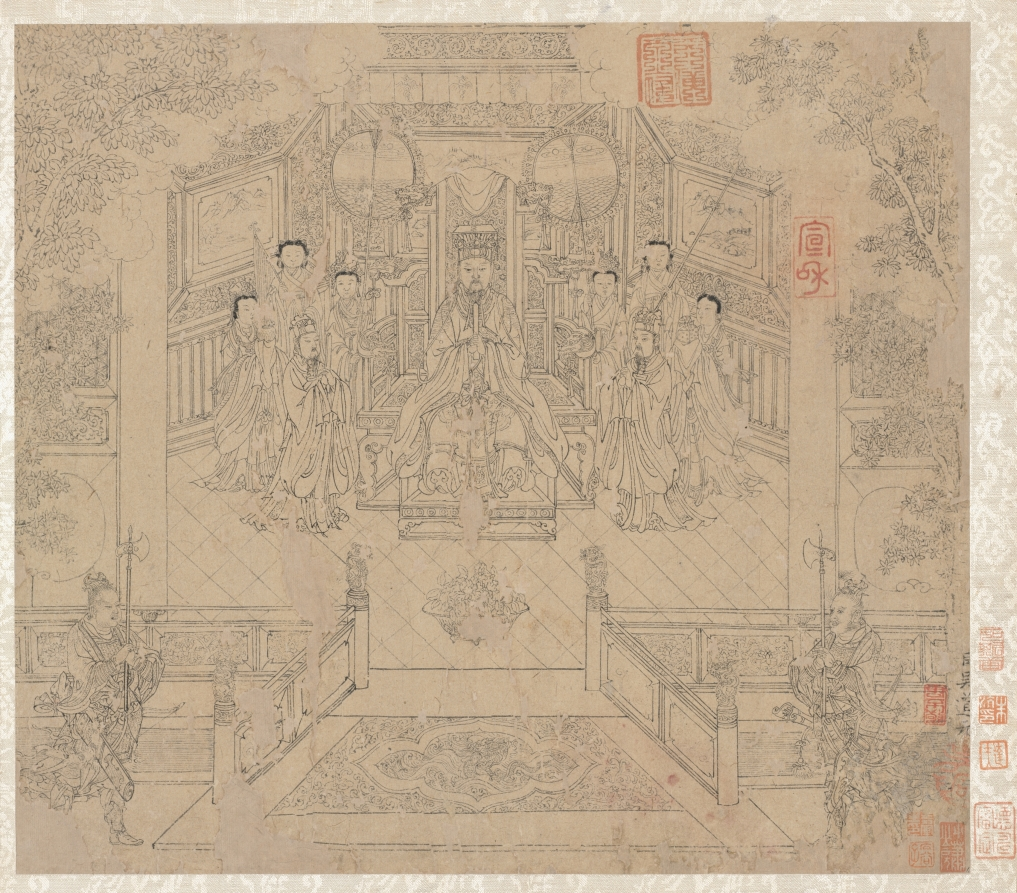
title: Album of Daoist and Buddhist Themes: Procession of Daoist Deities: Leaf 1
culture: China, Southern Song dynasty (1127-1279)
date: 1200s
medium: Album, ink on paper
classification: Painting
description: Leaf 1 portrays one of the three supreme deities in the Daoist religion. Dressed in a garment and hat similar to that of an earthly emperor, this heavenly being holds a tablet in a posture also reminiscent of a mortal ruler. He is shaded by a pair of fans, surrounded by female consorts and their maidens, and attended by ministerlike figures on both sides. Again, as seen in the mundane world, two guards holding weapons stand immediately in front of and below the platform that supports this majestic figure. Despite the symmetry and hierarchical composition, the whole scene comes alive in a wonderful sense of clarity and subtlety. Sketched in fine lines and evincing a wonderful sense of flow, especially in the draperies, the figural group is fully integrated in an architectural setting that is just as exquisite.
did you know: A pot of purple crepe myrtle blossoms (ziwei 紫微) is directly before the Ziwei Emperor 紫微大帝.